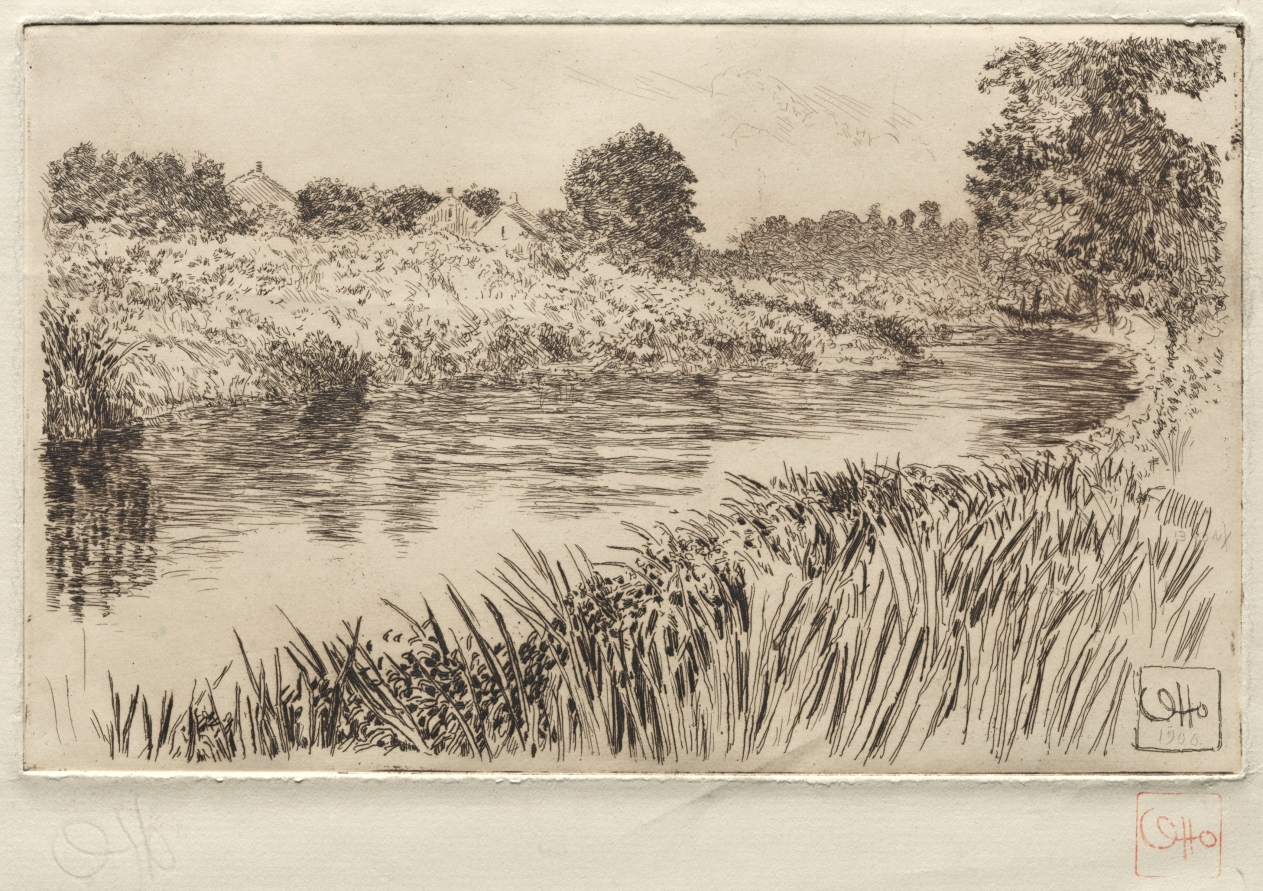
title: On the Bronx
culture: America, early 20th Century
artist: Otto H. Bacher (American, 1856–1909)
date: 1906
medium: etching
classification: Print